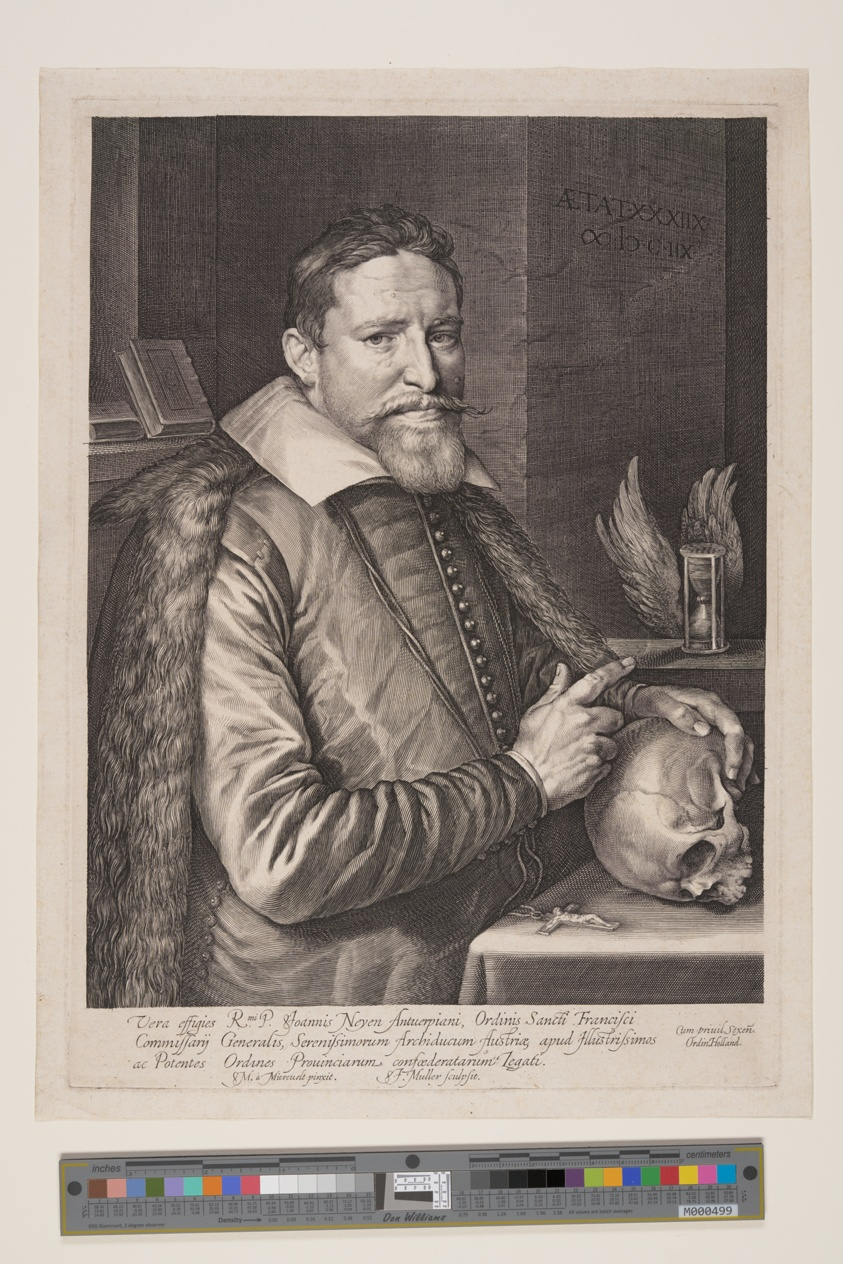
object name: Print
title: Joannes Neyen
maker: Jan Harmensz Muller (Dutch, 1571–1628); after Michiel van Mierevelt (Dutch, 1567-1641)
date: 1608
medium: Engraving on ivory laid paper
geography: Netherlands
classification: print; paper; prints and drawing; engraving